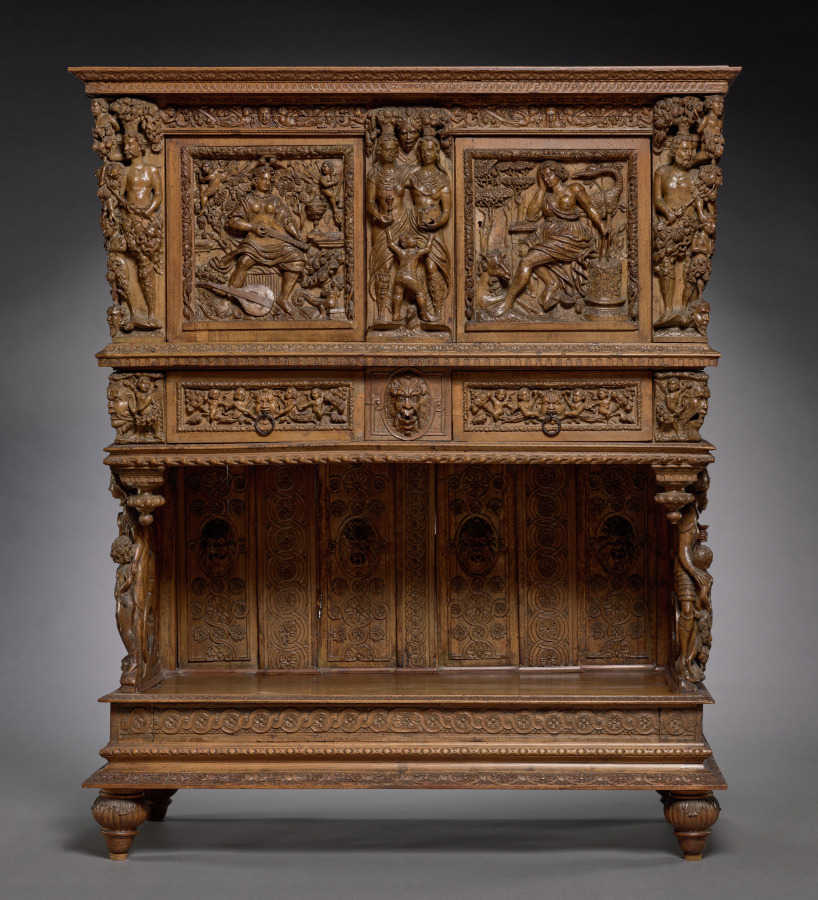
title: Dressoir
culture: France, Burgundy, 16th century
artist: style of Hugues Sambin (French, 1518–c. 1601)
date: mid 1500s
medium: walnut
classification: Furniture and woodwork